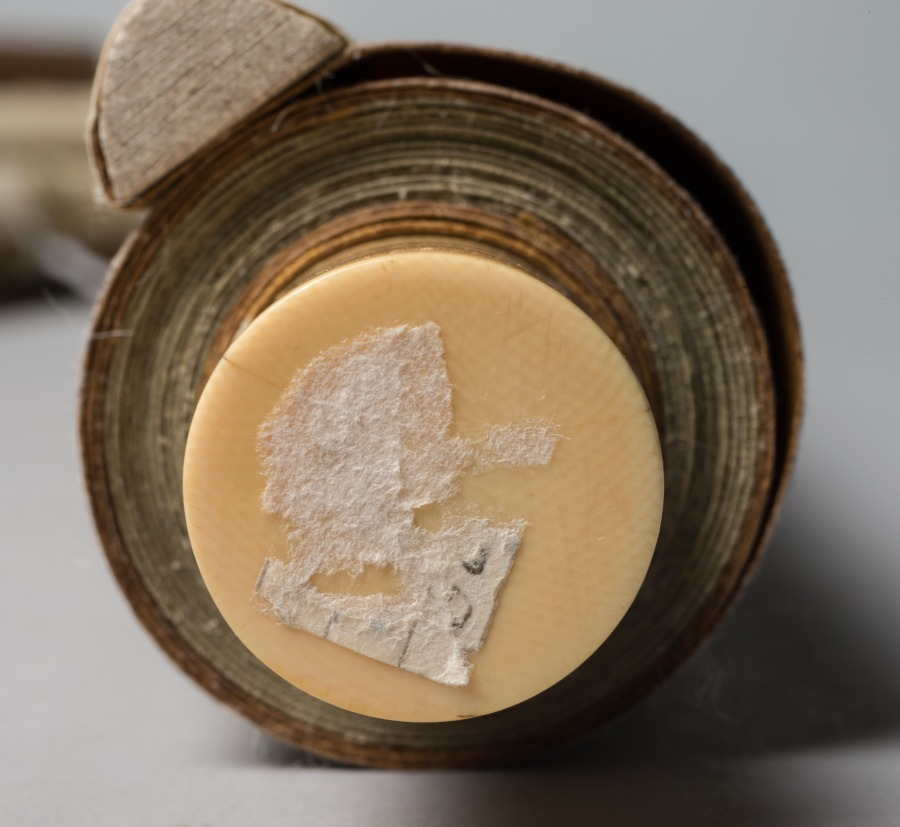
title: Minamoto no Nakakuni Visits Lady Kogō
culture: Japan, Edo period (1615–1868)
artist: Kiyohara Yukinobu (Japanese, 1643–1682)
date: late 1600s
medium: One of a triptych of hanging scrolls; ink and color on silk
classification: Painting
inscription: 款記「清原氏女雪信筆」/「清原女」朱文八角印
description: Kiyohara Yukinobu was one of Japan's earliest and most talented female painters. Kiyohara preferred Japanese-style painting techniques and subjects. Her work depicts the scenery and history of her native land. In addition to the tonalities of ink, she applied a delicate range of colors that help identify the seasons, an important theme in Japanese life and culture.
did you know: This day-lit spring scene is the right part of a triptych presenting an episode from The Tale of the Heike.